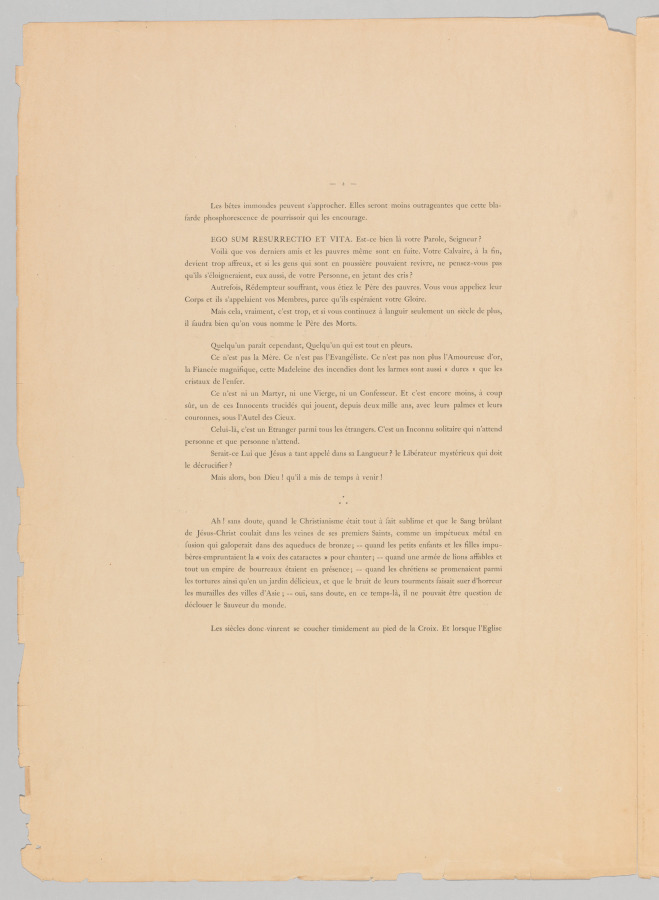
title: The Vintages: The Vintages!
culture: Belgium, 19th century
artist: Henri de Groux (Belgian, 1867–1930)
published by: L'Estampe Originale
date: 1894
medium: letterpress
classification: Print